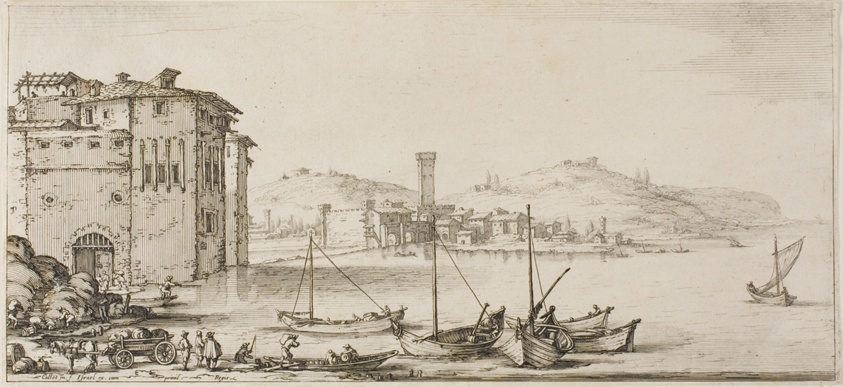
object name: Print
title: Loading Merchandise, from Various Scenes Designed in Florence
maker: Jacques Callot (French, 1592-1635)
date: 1618–20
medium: Etching on paper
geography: France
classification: etching; print; prints and drawing